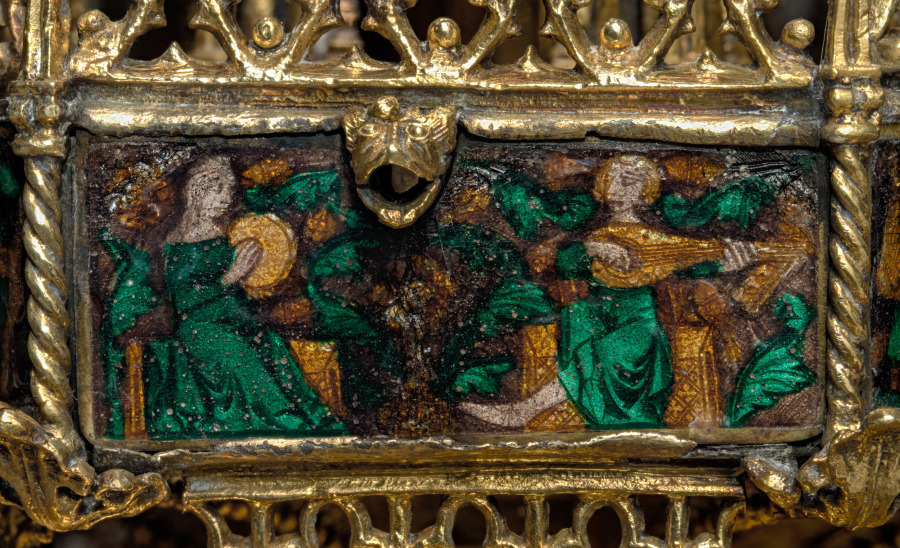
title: Table Fountain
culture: France, Paris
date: c. 1320–40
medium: gilt-silver and translucent enamels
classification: Metalwork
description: Conceptually and stylistically, this object is beyond all else a piece of Gothic architecture in miniature with vaults, pinnacles, columns, and traceried arches. Though the artist who created it is unknown, he was unquestionably inspired by the great Gothic buildings of his time. The table fountain is a three-tiered assembly combining cast elements with bent sheets of gilt-silver. To these have been attached a series of enamel plaques representing grotesque figures, some of which play musical instruments. Water wheels and bells were added to capture motion and sound. The rich detail, precious materials, and involved ornamentation of this deluxe object suggest it would have been expensive to produce and highly treasured by its original owner, someone of high status, and would have been deployed as an object of spectacle. This is the most complete example of its type known to survive from the Middle Ages. Medieval inventories reveal that small fountains like this, often taking various forms, and generally made from precious metals, once existed in large numbers, thus making the Cleveland table fountain an extremely rare object.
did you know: This fountain with its minute architectural details and finely made enamel plaques displayed the wealth and refinement of the owner as it entertained his guests. Imagine hearing the ringing of the tiny bells when this fountain was in use.